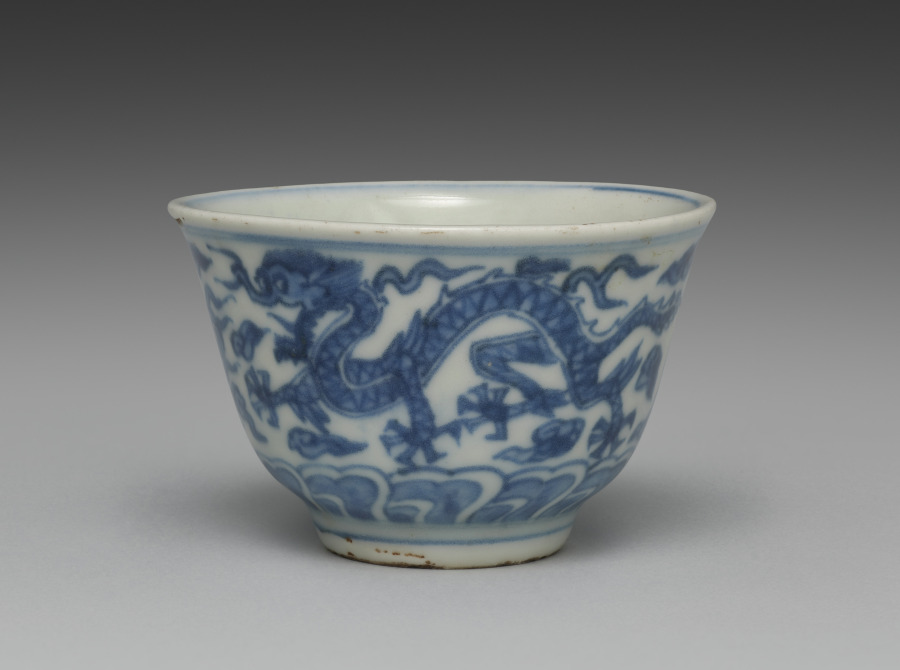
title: Cup from Tea Cups with Dragons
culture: Japan, Edo period (1615–1868)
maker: Seifū Yohei I (Japanese, 1801–1861)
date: 1840s–57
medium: One from a set of five tea cups; porcelain with underglaze blue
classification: Ceramic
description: Seifū Yohei I made both blue and white porcelains after Ming dynasty (1368–1644) Chinese wares fired in the kilns at Jingdezhen for export. He also made colorful stoneware in the style of his teacher, Nin’ami Dōhachi (Takahashi Dōhachi II) (1783–1855).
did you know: A small figure of an elephant serves as the handle for the lid.